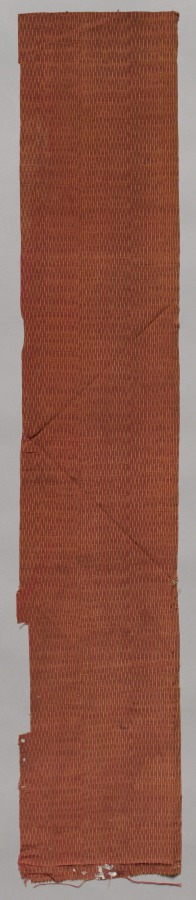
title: Fragment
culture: India, Surat, 19th century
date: 1800s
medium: tightly woven cotton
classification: Textile